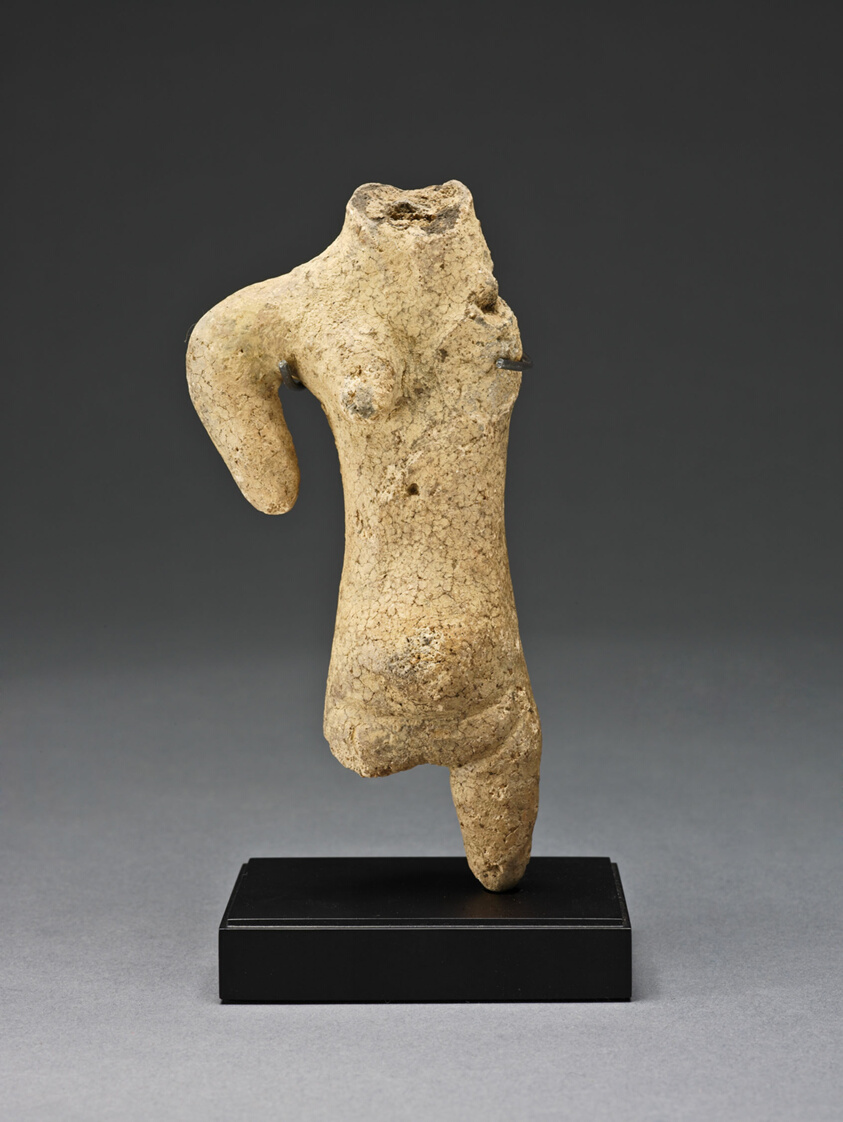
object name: Religious/Ritual Object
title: Partial Figure of a Pregnant Women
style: Japanese (culture or style)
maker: Japan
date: 1000–300 BC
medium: Earthenware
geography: Japan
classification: ritual objects